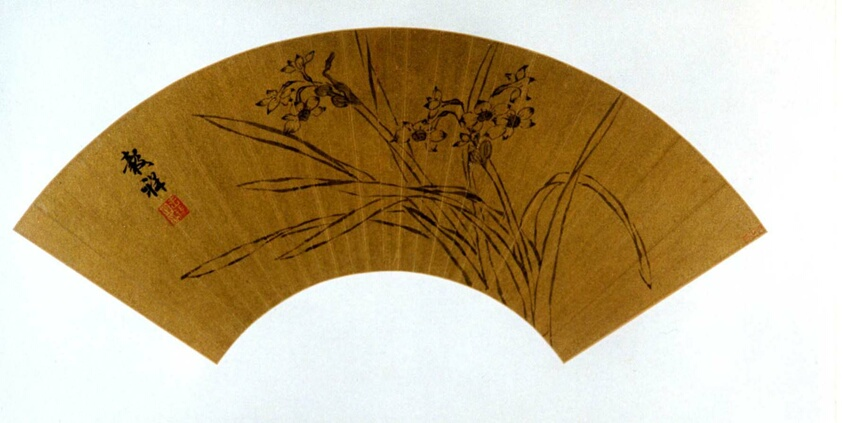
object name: Painting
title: Narcissus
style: Chinese (culture or style)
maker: Wang Guxiang (Chinese, 1501-1568)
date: Ming dynasty (1368–1644), 16th century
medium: Folding fan mounted as an album leaf; ink on gold paper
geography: China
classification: album leaf; fan; painting; asian art